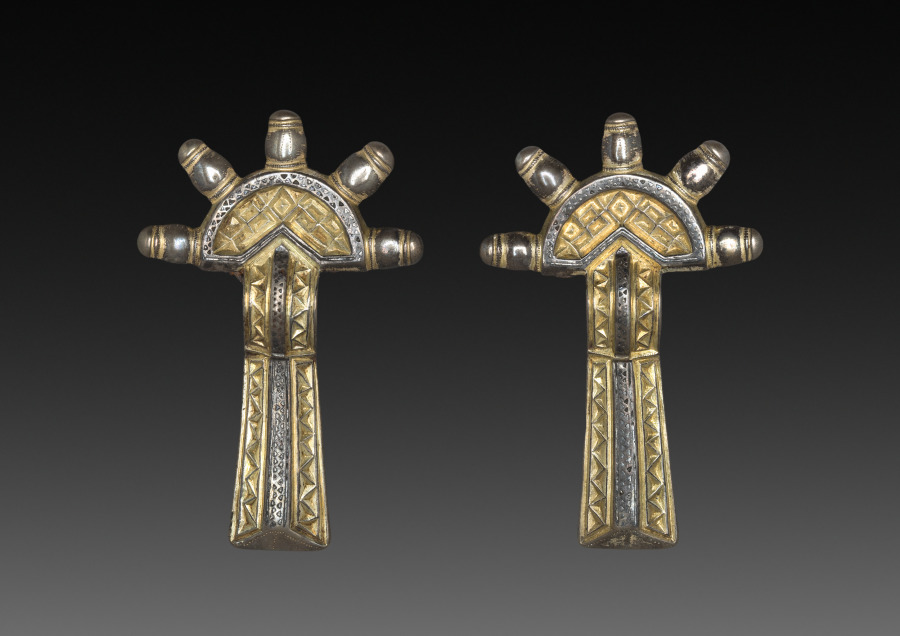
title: Bow Fibulae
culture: Alemannic, 6th century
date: 500–550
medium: silver gilt and niello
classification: Jewelry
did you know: This type of fibula, or pin, is also called a "digitized fibula" because of its radiating knobs that resemble fingers.